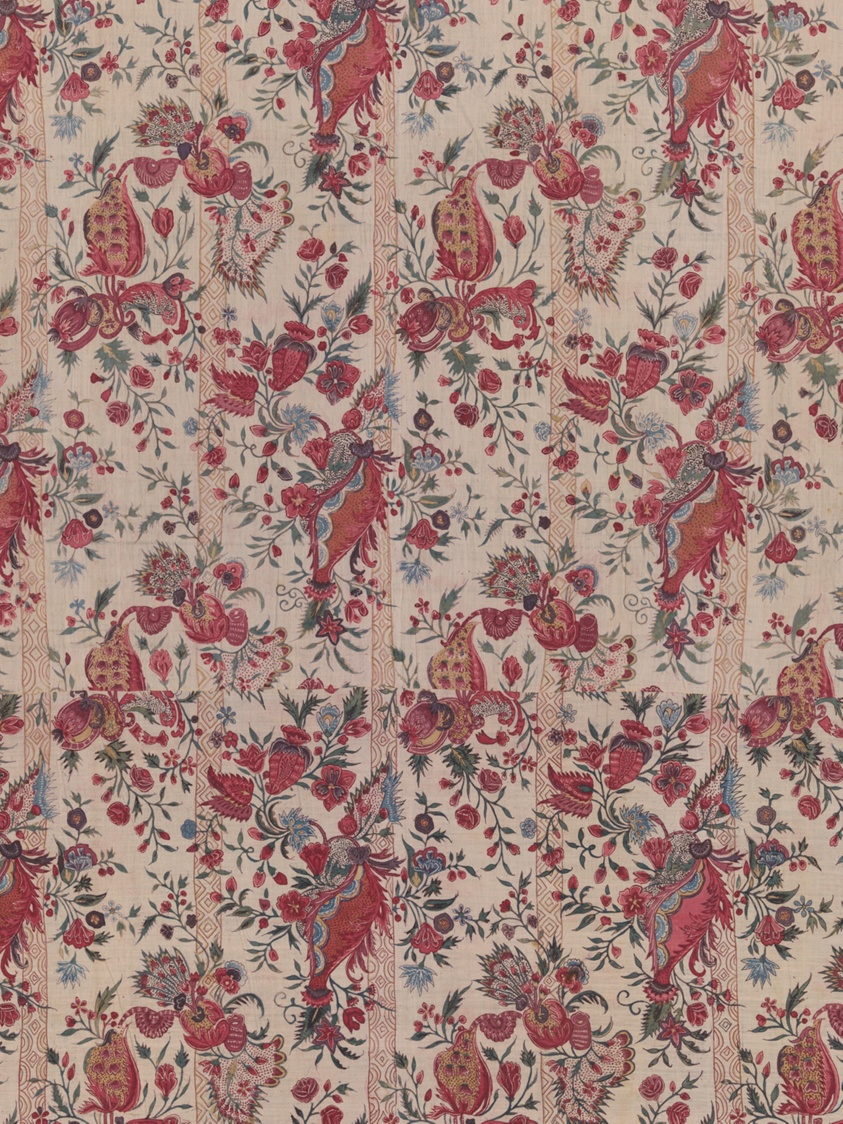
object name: Coverings and Hangings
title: Chintz Curtain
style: 18th Century, chintz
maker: Indian export for European market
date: First quarter 18th century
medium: Cotton, plain weave; painted and resist-dyed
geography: India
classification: weaving; textile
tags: botanical/floral, abstract objects, diamond shapes, floral motifs, flowers